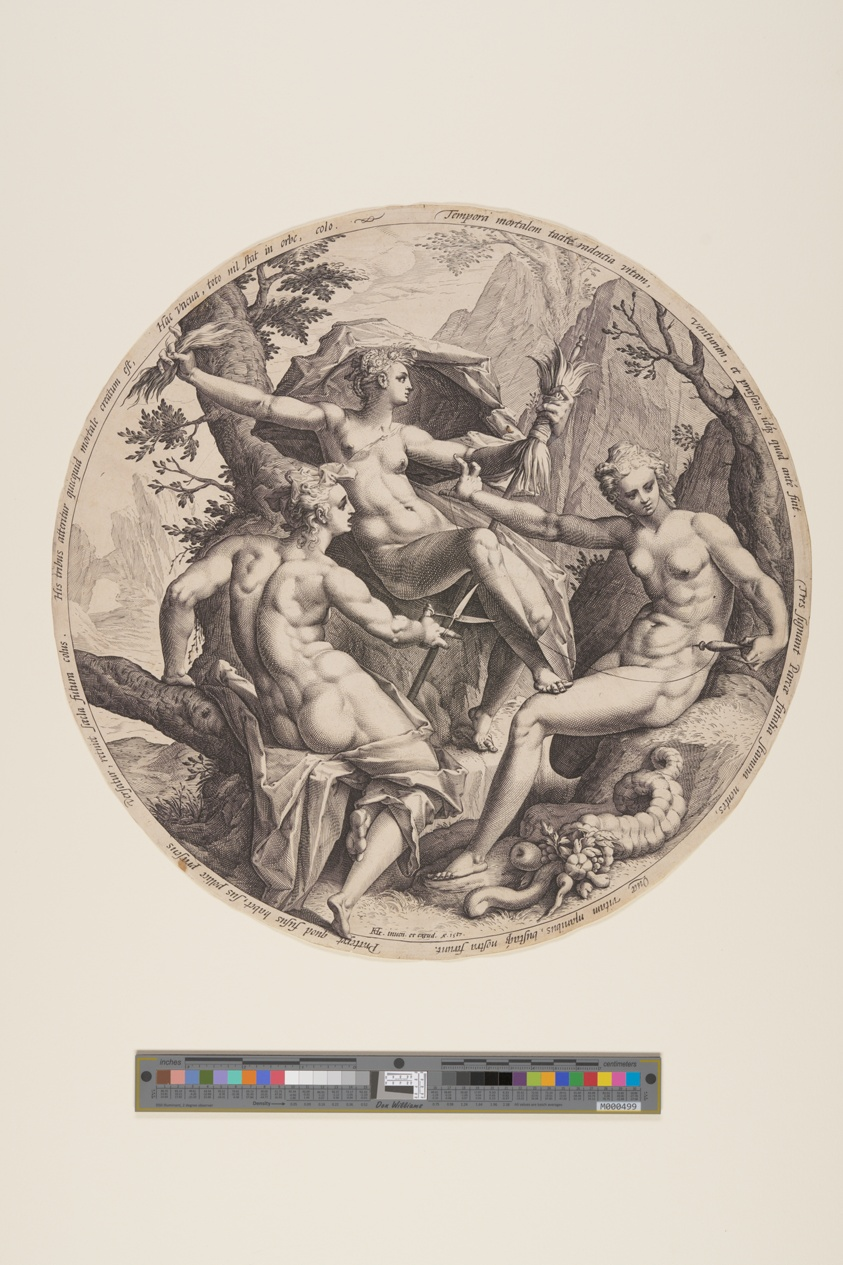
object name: Print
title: The Three Fates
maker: Attributed to Jacob Matham (Dutch, 1571–1631); after Hendrick Goltzius (Dutch, 1558–1617)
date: 1587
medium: Engraving on ivory laid paper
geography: Netherlands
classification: engraving; paper; print; prints and drawing